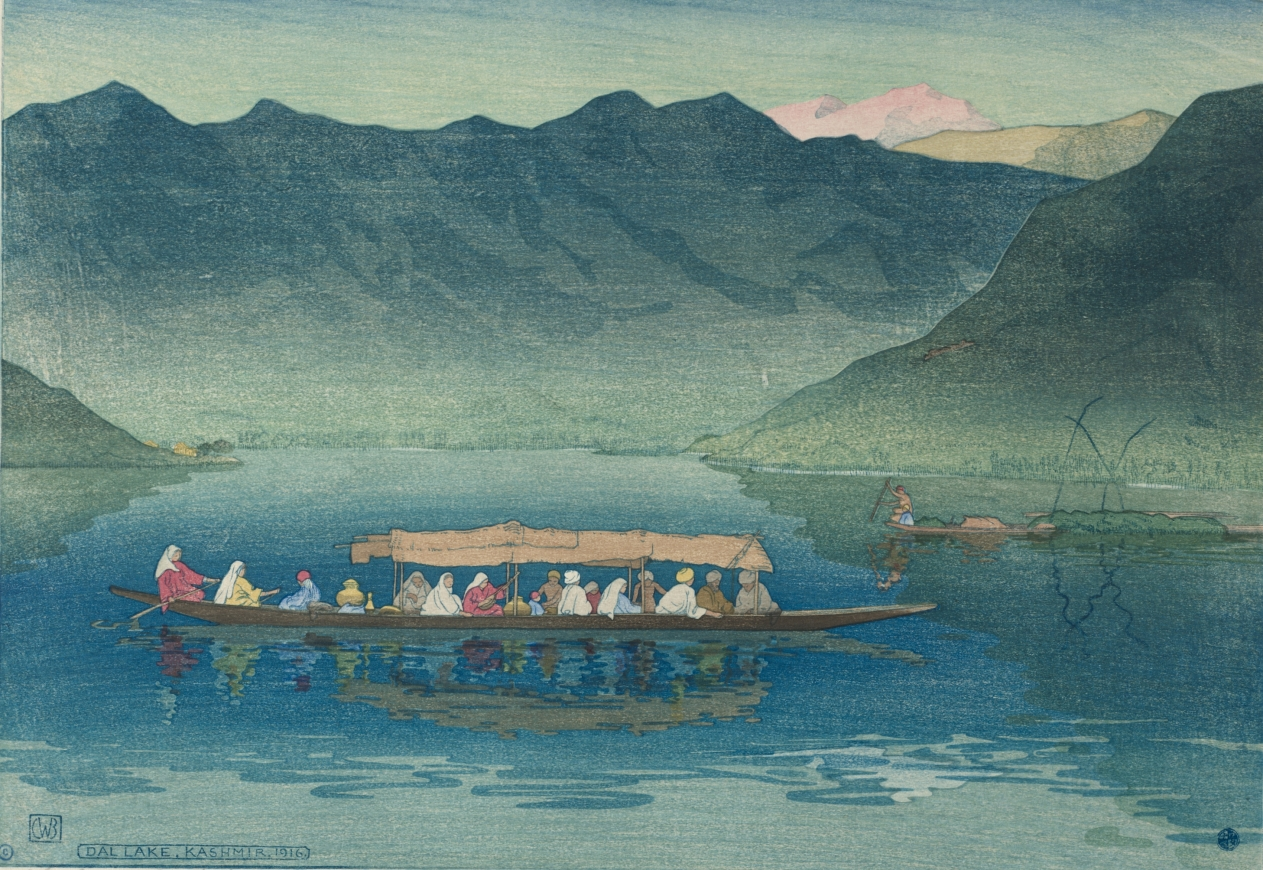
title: Dal Lake, Kashmir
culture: England, 20th century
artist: Charles William Bartlett (British, 1860–1940)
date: 1916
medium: color woodcut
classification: Print